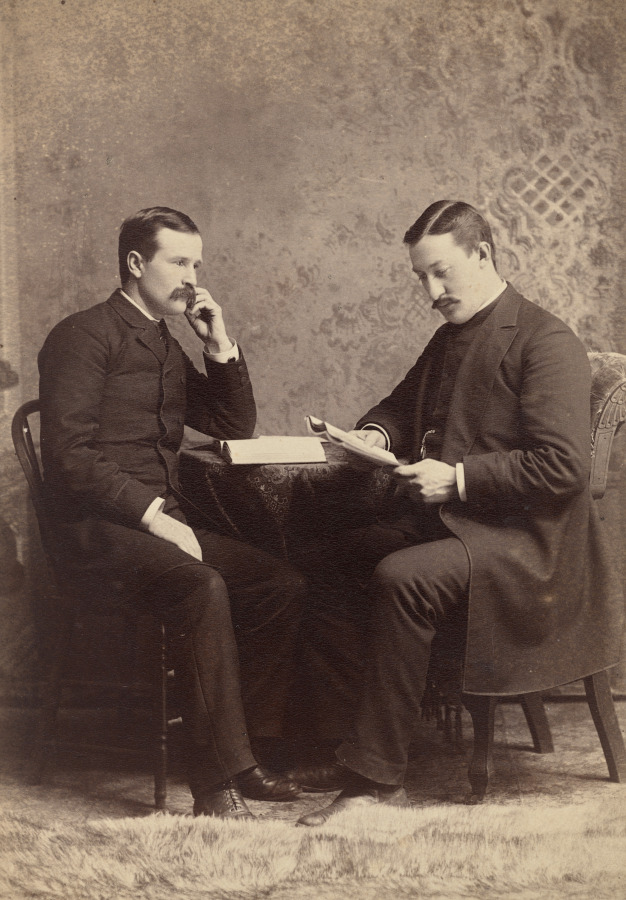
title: Untitled (seated portrait of two men, one with a book, the other reading a magazine)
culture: America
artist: A.H. Fell (American, 19th century)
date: 1880s-1890s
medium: albumen print, cabinet card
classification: Photograph